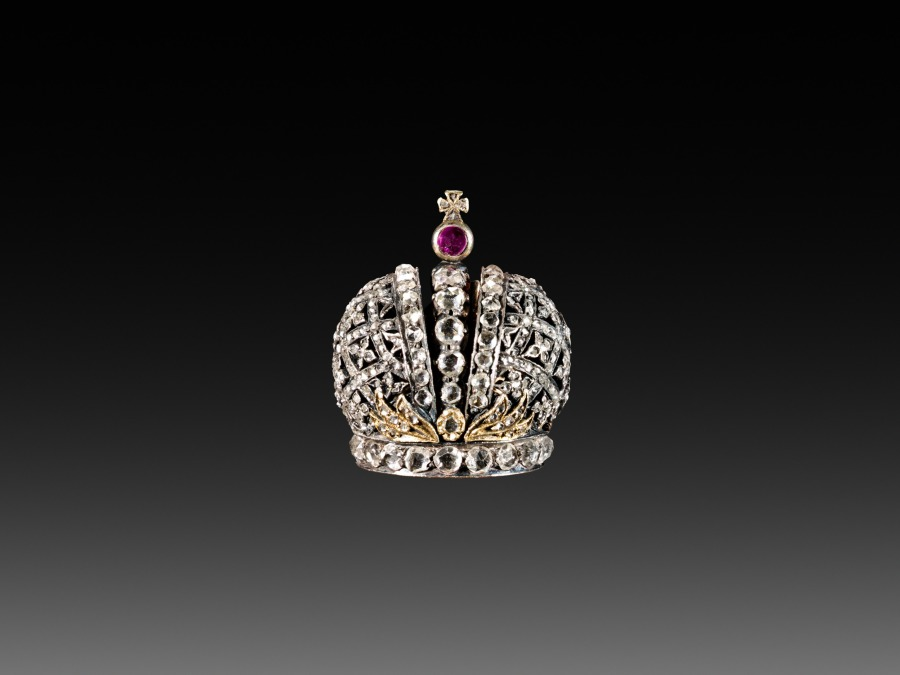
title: Miniature Crown Surprise from the Lapis Lazuli Easter Egg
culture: Russia, St. Petersburg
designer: attributed to Peter Carl Fabergé (Russian, 1846–1920)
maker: attributed to House of Fabergé (Russian, 1842–1918)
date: c. 1885–90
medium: gold, enamel, lapis lazuli, pearls, diamonds, rubies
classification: Miscellaneous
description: This Easter egg, like the subsequent ones produced by Fabergé for the imperial family, contains a surprise when opened. In this case, the egg opens to display a yellow enameled cover, resembling an egg yolk, which then opens to reveal a tiny replica of the Russian imperial crown, containing either a ruby or a pink sapphire suspended on a chain.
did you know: The tiny diamond encrusted crown surprise is a replica of the Russian imperial crown made for Empress Catherine the Great in the 1700s.